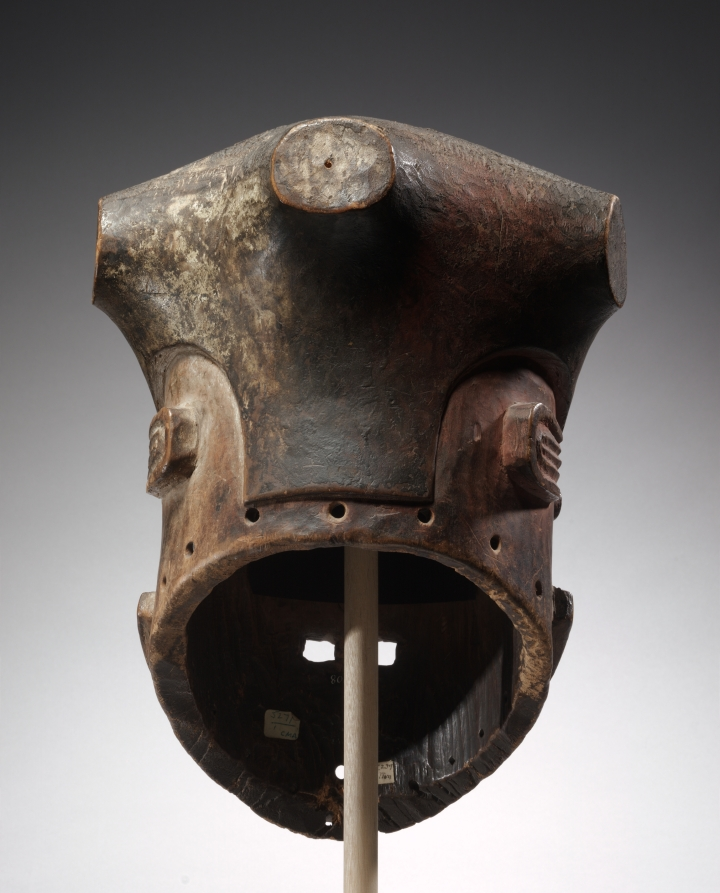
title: Mask (Bwoom)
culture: Africa, Central Africa, Democratic Republic of Congo, Kuba-style carver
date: mid- to late 1800s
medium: Wood and paint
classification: Mask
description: Among the Bushoong, the central Kuba group, the mask known as bwoom—most typically identified as the head of a hunter-gatherer—forms a triad with a female mask and another male mask. All three are protagonists in the reenactment of the foundation of the Kuba kingdom. Outside the capital, however, bwoom appears in different non-royal contexts, such as the men’s initiation society.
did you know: Imagine this mask topped with eagle feathers; they would have been added only on special occasions when it was performed.